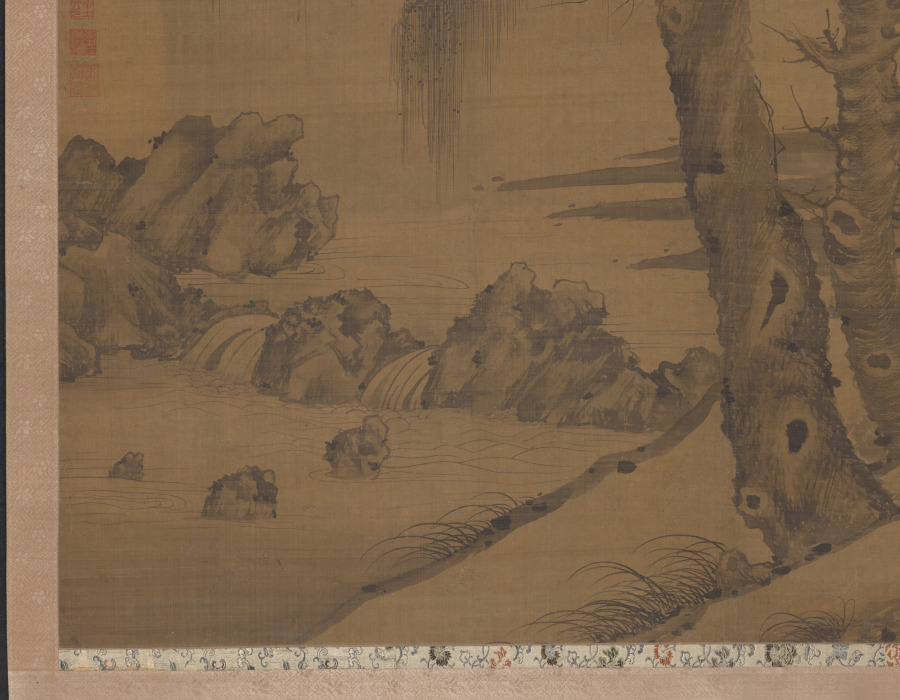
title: Old Trees by a Cool Spring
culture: China, Yuan dynasty (1271-1368)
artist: Li Shixing (Chinese, 1283–1328)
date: 1326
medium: hanging scroll; ink on silk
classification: Painting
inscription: 泰定丙寅年冬十二月薊丘李士行遵道作。[印] 李士行印; 李氏遵道; 遊戲翰墨.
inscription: 薊丘李侯能畫松，蟠根錯節騰蛟龍。 枯梢削鐵歲月古，細葉當風紫翠重。 昔人曾入子固夢，此株豈為秦官封。 畢宏韋偃偕已矣，請公放筆吾將從。 華溪九十翁沈夢麟書 蘊中上人題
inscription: [印] 明善堂所見書畫印記; [印] 怡親王寶